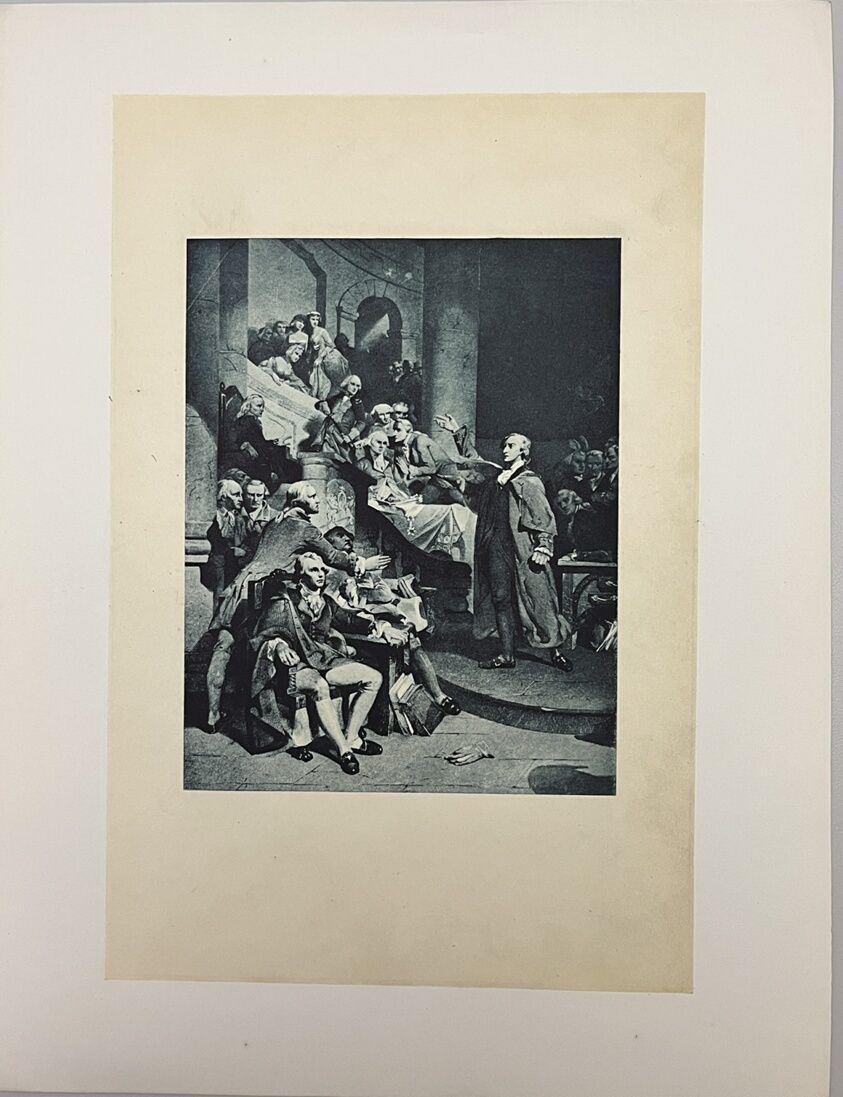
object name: Print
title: Untitled (Assembly)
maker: Artist Unknown (Likely American or British, 19th century)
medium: Color lithograph on paper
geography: United States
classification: reproduction; print; prints and drawing